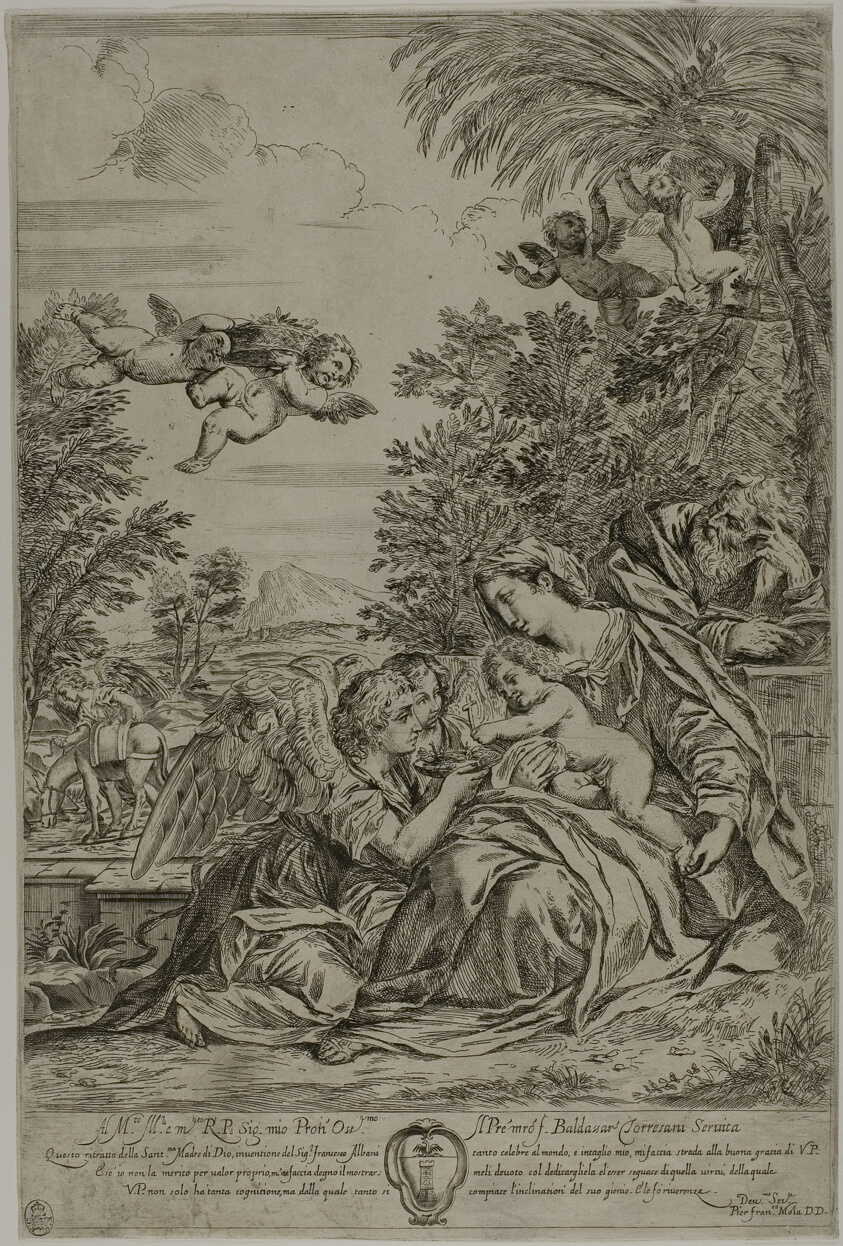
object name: Print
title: Flight into Egypt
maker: Pier Francesco Mola (Italian, 1612-1666)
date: 1647/66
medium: Etching on ivory laid paper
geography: Italy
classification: etching; print; prints and drawing